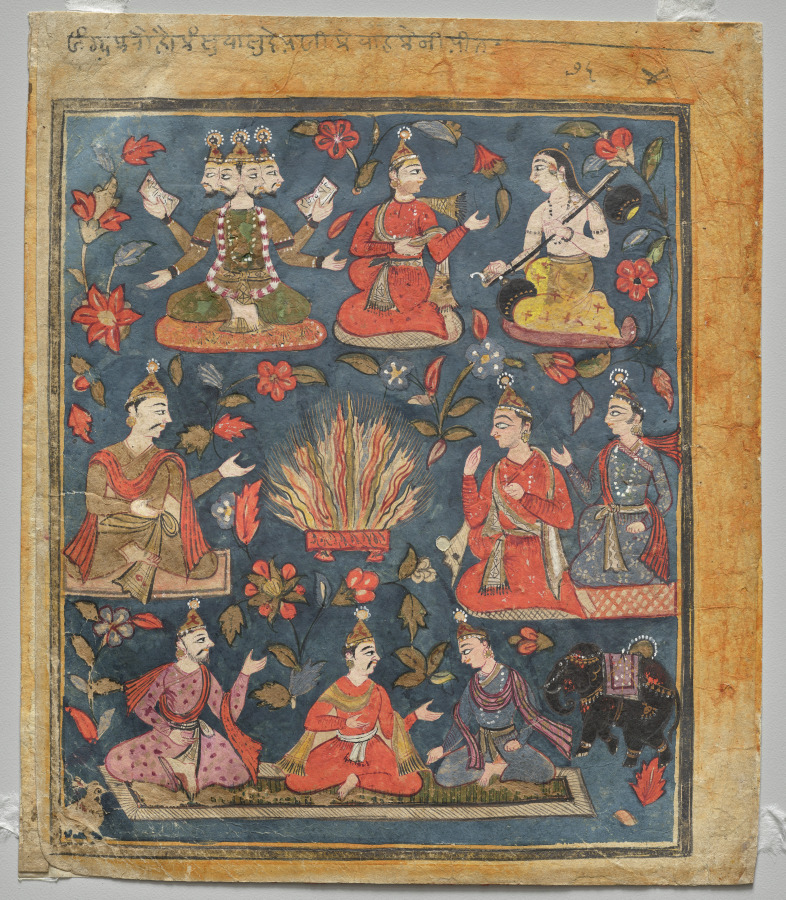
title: Sacrificial Fire, from the "Tula Ram" Bhagavata Purana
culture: Western India, Gujarat, Surat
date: c. 1720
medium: Gum tempera, ink, and gold on paper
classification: Painting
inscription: jagya karau hau kaṃsu bāsudevajī ke bāha ke nīvīta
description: The evil king Kamsa organized a fire sacrifice in order to bring about the death of his brother-in-law, Vasudeva, father of the Hindu god incarnated as Krishna. The four-armed god of creation, Brahma, attends at the upper left with the sage, or holy man, Narada at the upper right. Scholars have linked the copious floral motifs throughout this dispersed series with textile patterns. This series was created in a port city, the center of flourishing international textile trade.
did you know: The sage Narada in the upper right corner plays a stringed instrument called a vina.